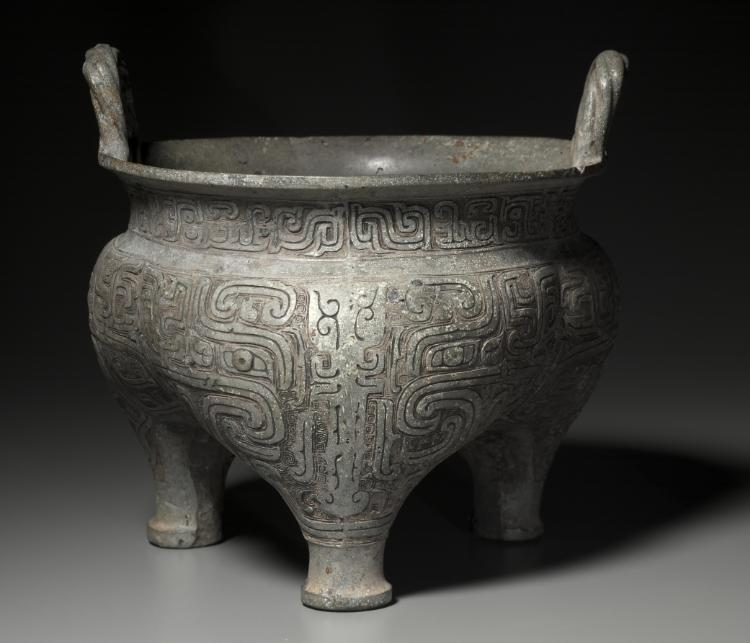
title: Hollow-Legged Tripod (Li Ding)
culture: China, Shaanxi province, Xi'an, Western Zhou dynasty (c. 1046–771 BCE)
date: late 900 BCE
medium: bronze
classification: Metalwork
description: This food vessel exhibits a new decorative trend of metropolitan Western Zhou foundries. Zoomorphic images became increasingly abstract and subject to linear elaboration. The dominating animal mask (taotie) of the Shang is here transformed, dissolved, and dissected into intricate patterns of curving bands and median grooves. The design is abstract but not devoid of symbolic contents and functions. A smooth and even gray-green patina--the result of natural corrosion during burial--covers the outside and creates a new visual impact on the surface decoration.